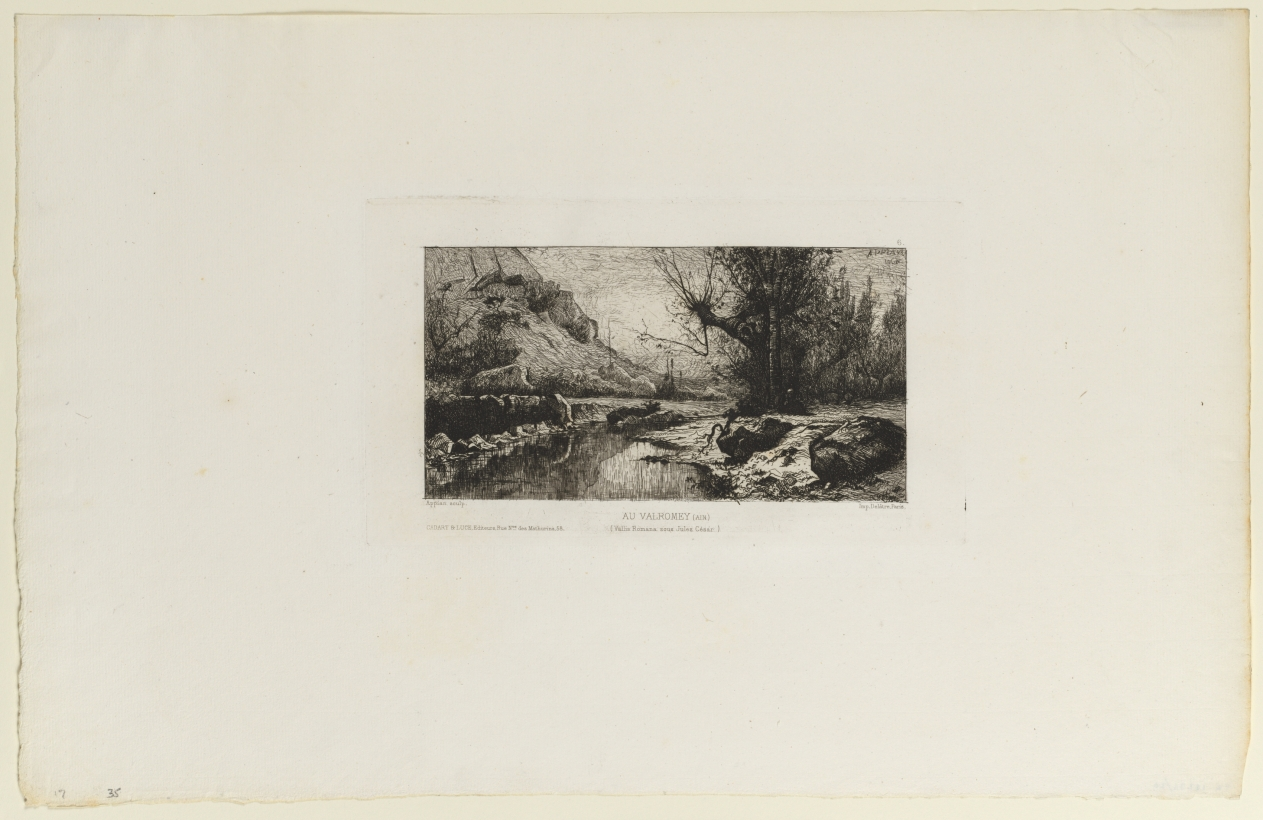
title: At Valromay (Ain)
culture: France, 19th century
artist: Adolphe Appian (French, 1818–1898)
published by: Cadart et Luce, Editeurs, rue Nve. des Mathurins, 58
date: 1868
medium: etching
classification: Print